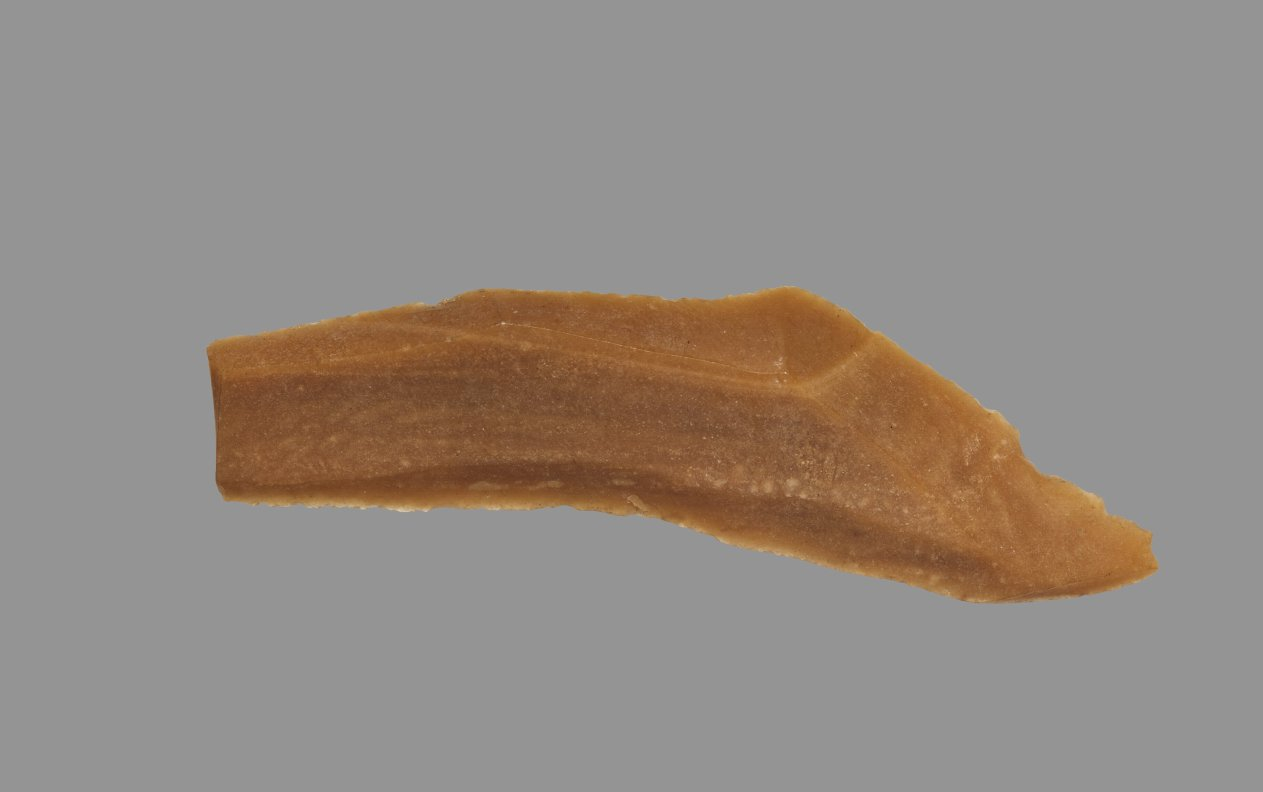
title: Sickle Blade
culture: Egypt, Middle Kingdom (2040–1648 BCE), Dynasty 12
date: 1980–1801 BCE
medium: flint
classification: Implements